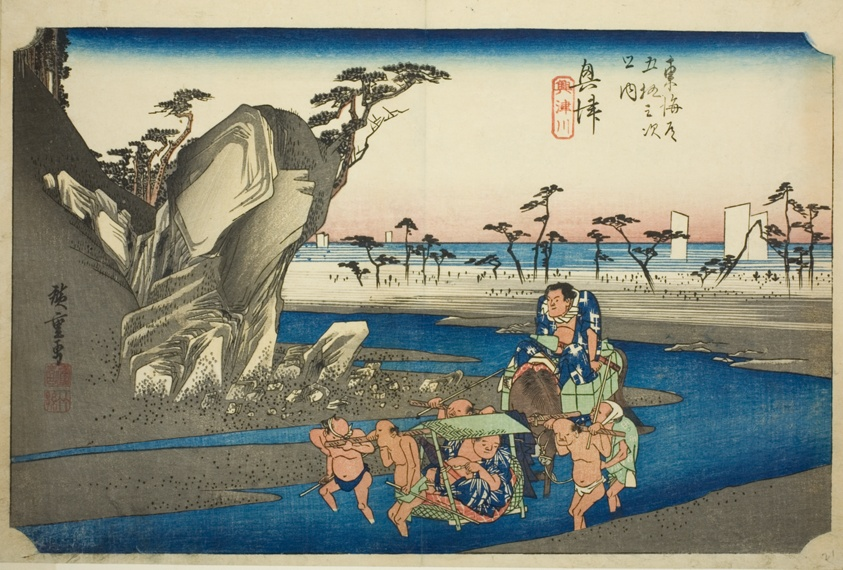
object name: Print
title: Okitsu: The Okitsu River (Okitsu, Okitsugawa), from the series "Fifty-three Stations of the Tokaido Road (Tokaido gojusan tsugi no uchi)," also known as the Hoeido Tokaido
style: Japanese (culture or style)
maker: Utagawa Hiroshige 歌川 広重; Japanese, 1797-1858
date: c. 1833/34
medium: Color woodblock print; oban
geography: Japan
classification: woodblock print; print; asian art